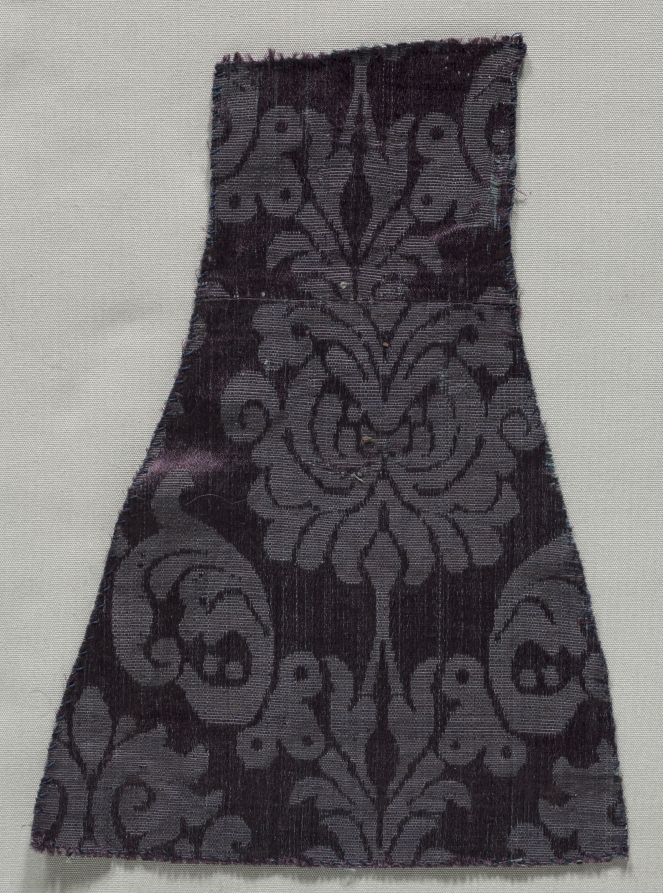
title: Textile Fragment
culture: Italy, 16th-17th century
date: 1500s-1600s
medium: damask (?), silk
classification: Textile